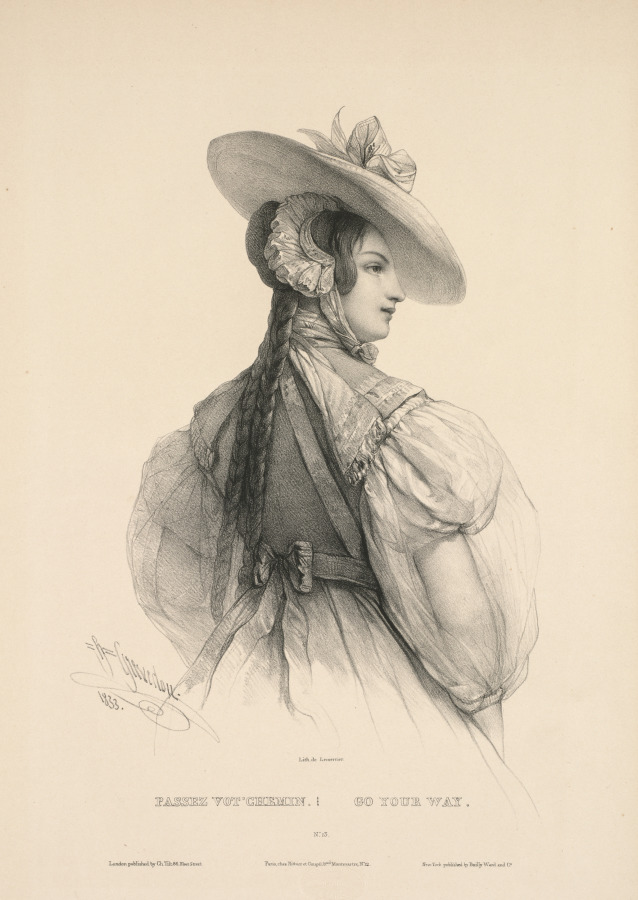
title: Go Your Way (Passez Vot'Chemin)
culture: France, 19th century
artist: Henri Grevedon (French, 1776–1860)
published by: Rittner & Goupil, Paris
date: 1833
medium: lithograph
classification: Print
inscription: Below image, in print: H. Grevedon, 1833; center below image: Lith. De Lemercier, Left: passez Vot'Chemin. Right: Go Your Way; center: No. 13. Lower left, corner: London published by Ch. Til. 86 Fleet Street, center; Paris, chez Ritner et Goupil, bard.